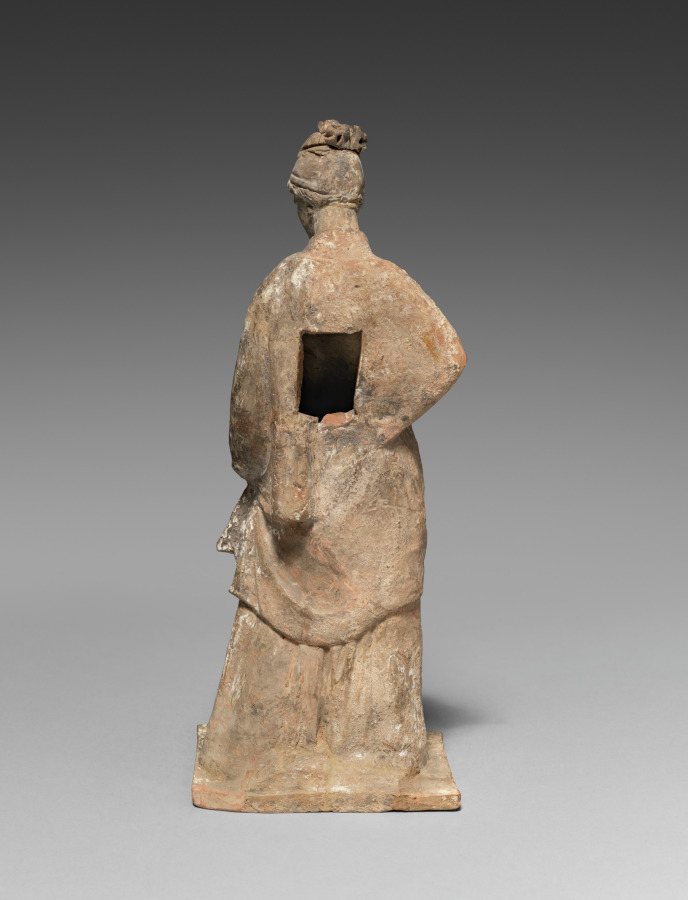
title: Figurine of a Lady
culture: Greece, Tanagra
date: 200s BCE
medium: terracotta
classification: Sculpture